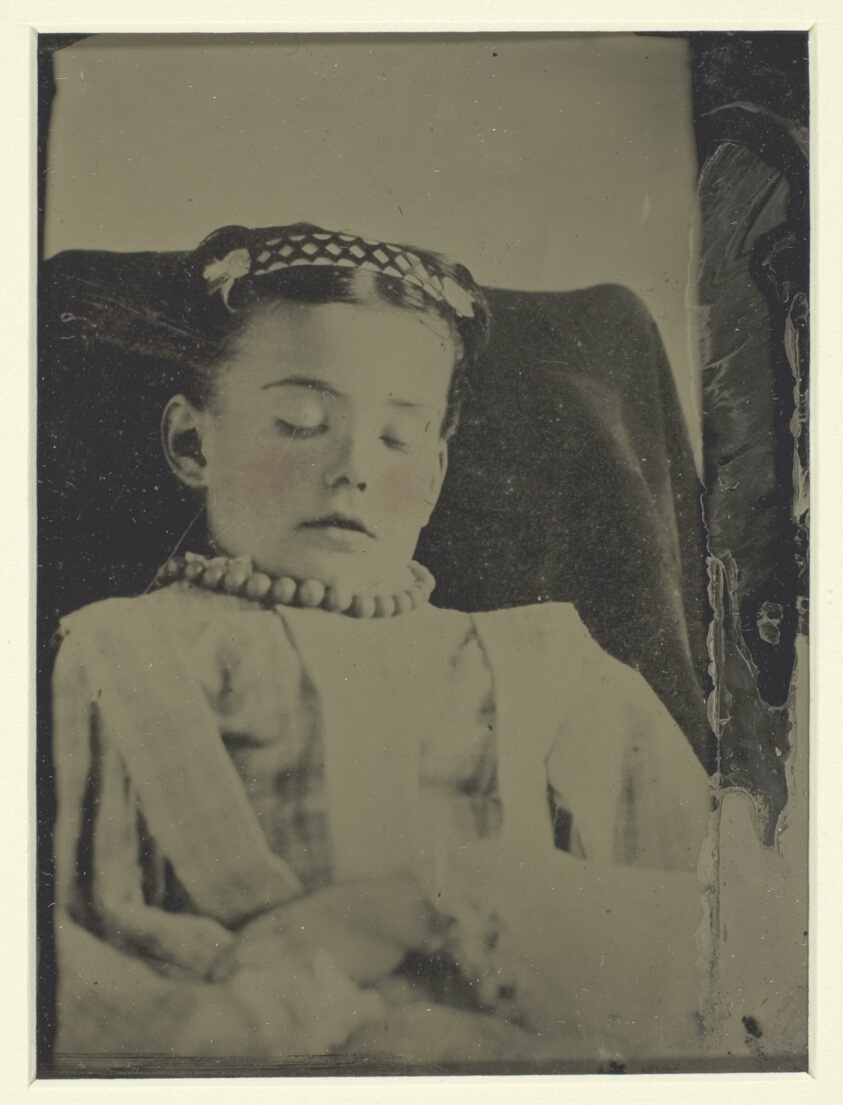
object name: Photograph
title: Untitled (Postmortem portrait)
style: 19th century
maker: Artist unknown; late 19th century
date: c. 1870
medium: Tintype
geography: Unknown Place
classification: tintype; photographic process; photography; photograph